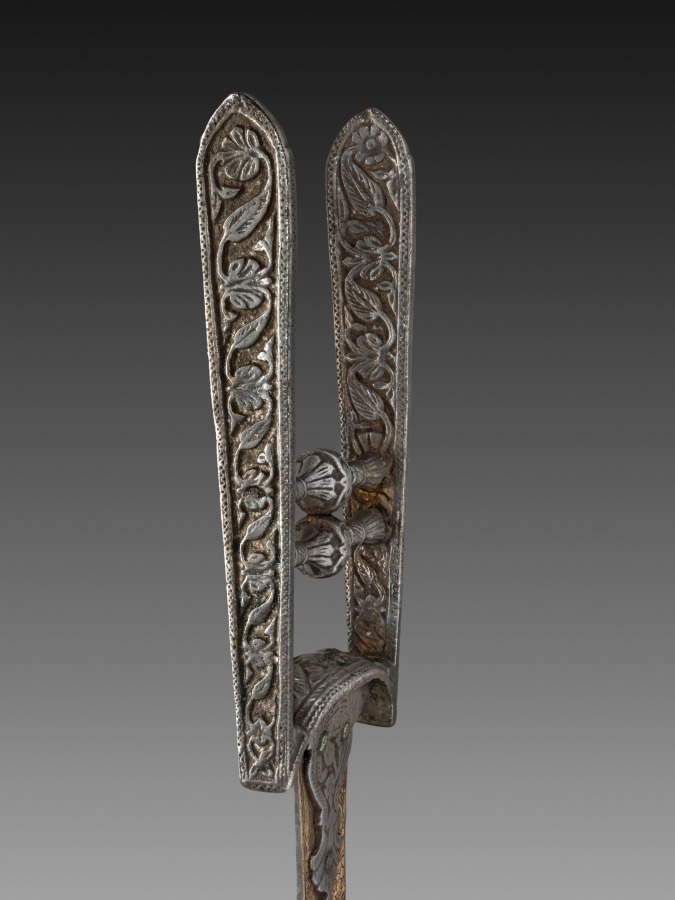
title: Dagger (Katar)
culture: India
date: 1800s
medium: steel with gold damascening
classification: Arms and Armor